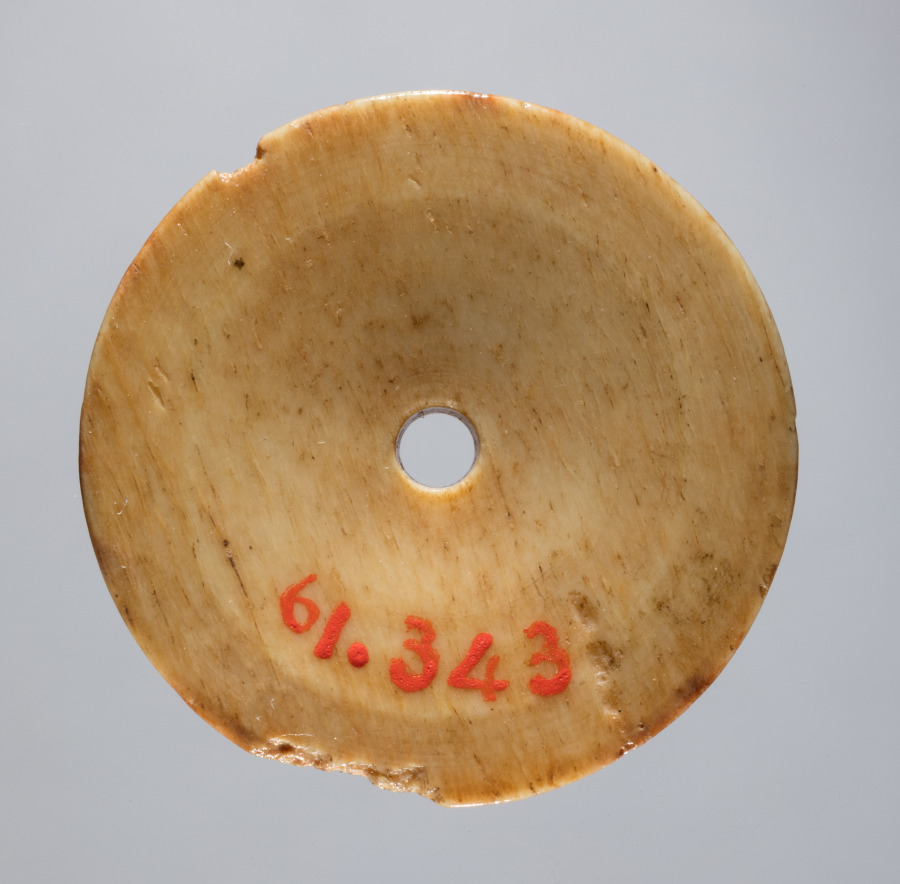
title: Spindle Whorl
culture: Iran, early Islamic period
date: 700s - 900s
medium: bone, incised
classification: Spindle Whorl